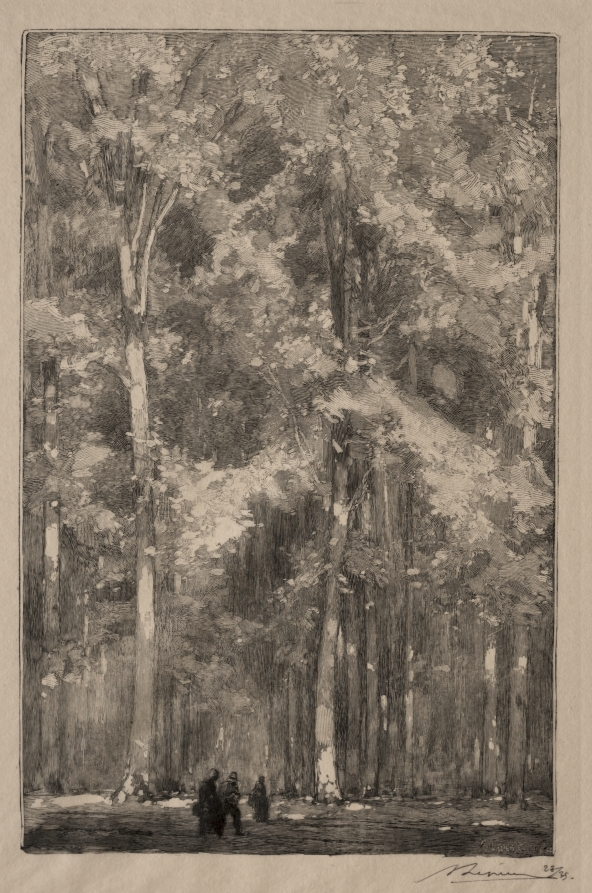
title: Le Matin, carrefour des Forts Marlotte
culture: France, 19th century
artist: Auguste Louis Lepère (French, 1849–1918)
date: 1889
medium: wood engraving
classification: Print